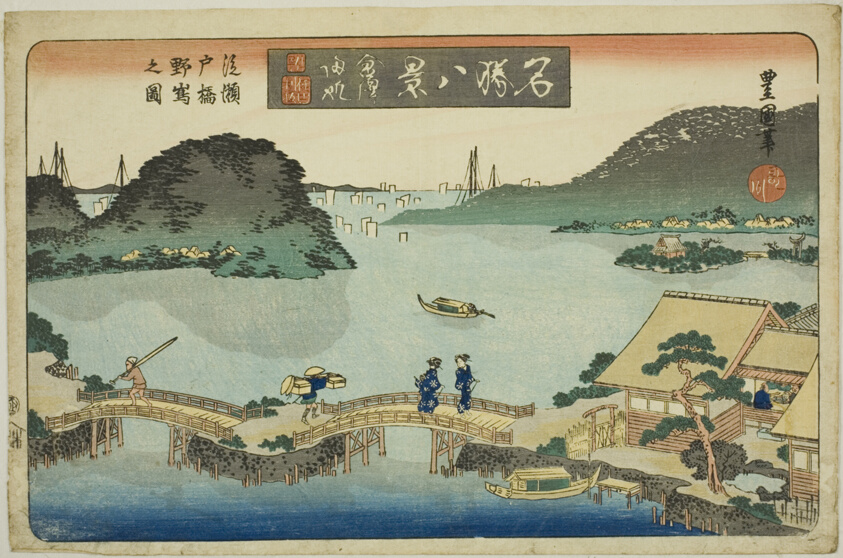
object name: Print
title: Returning Sails at Kanazawa, View of Nojima from Seto Bridge (Kanazawa kihan, Setobashi yori Nojima no zu), from the series "Eight Views of Famous Places (Meisho hakkei)"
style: Japanese (culture or style)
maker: Utagawa Toyoshige (Toyokuni II) (Japanese, 1777-1835)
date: c. 1833/34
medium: Color woodblock print; oban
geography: Japan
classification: woodblock print; print; asian art